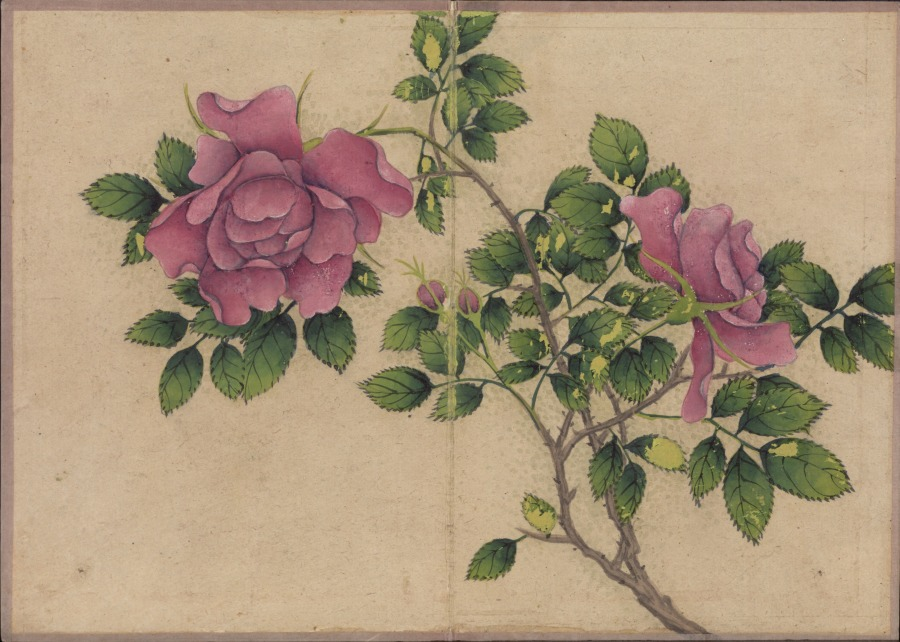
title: Desk Album: Flower and Bird Paintings (Rose)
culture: China, Qing dynasty (1644-1911)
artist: Zhang Ruoai (Chinese, 1713–1746)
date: 1700s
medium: album leaf, ink and color on paper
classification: Painting